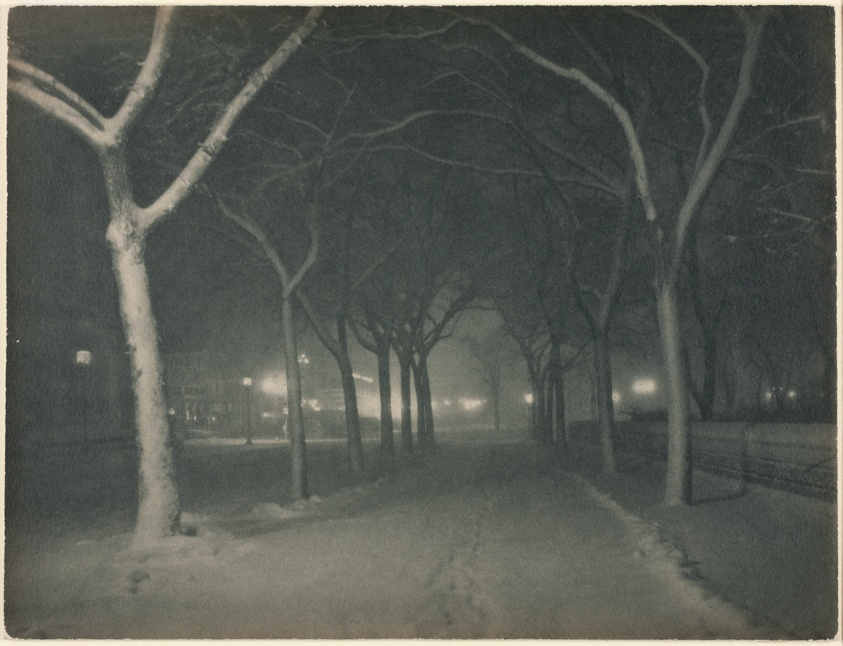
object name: Photograph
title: An Icy Night, New York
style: Pictorialism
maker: Alfred Stieglitz (American, 1864–1946)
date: 1898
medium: Carbon print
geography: United States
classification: carbon print; pigment process; photographic process; photography; photograph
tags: cityscapes